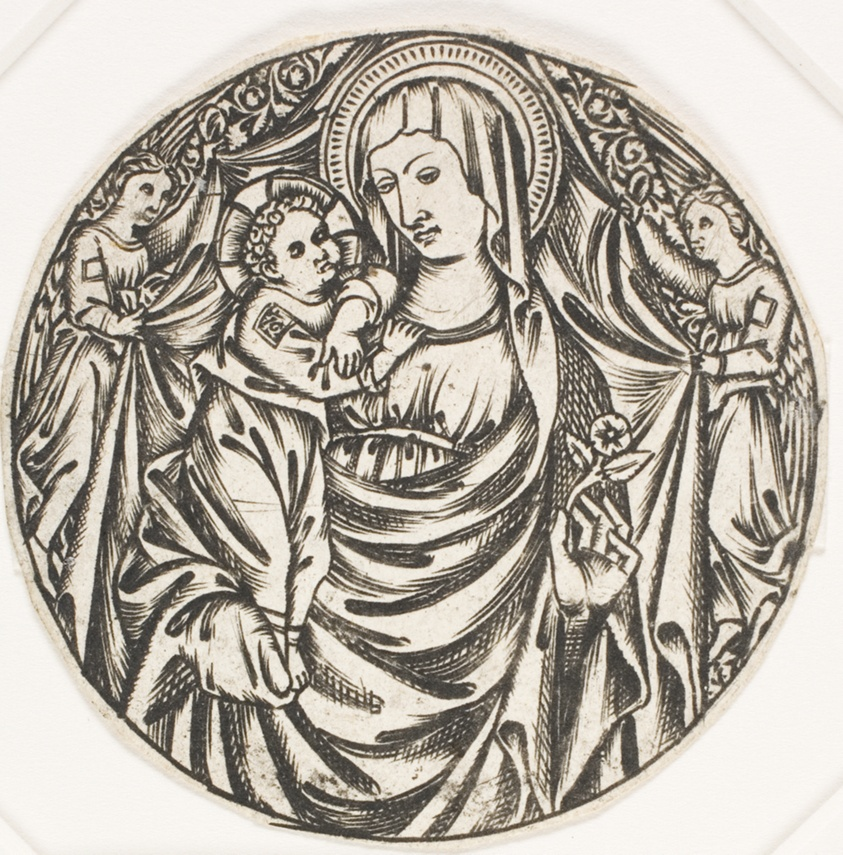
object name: Print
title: Virgin and Child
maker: Unknown artist (Italian, 15th century)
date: c. 1480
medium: Engraving in black on thick ivory laid paper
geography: Italy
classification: engraving; print; prints and drawing